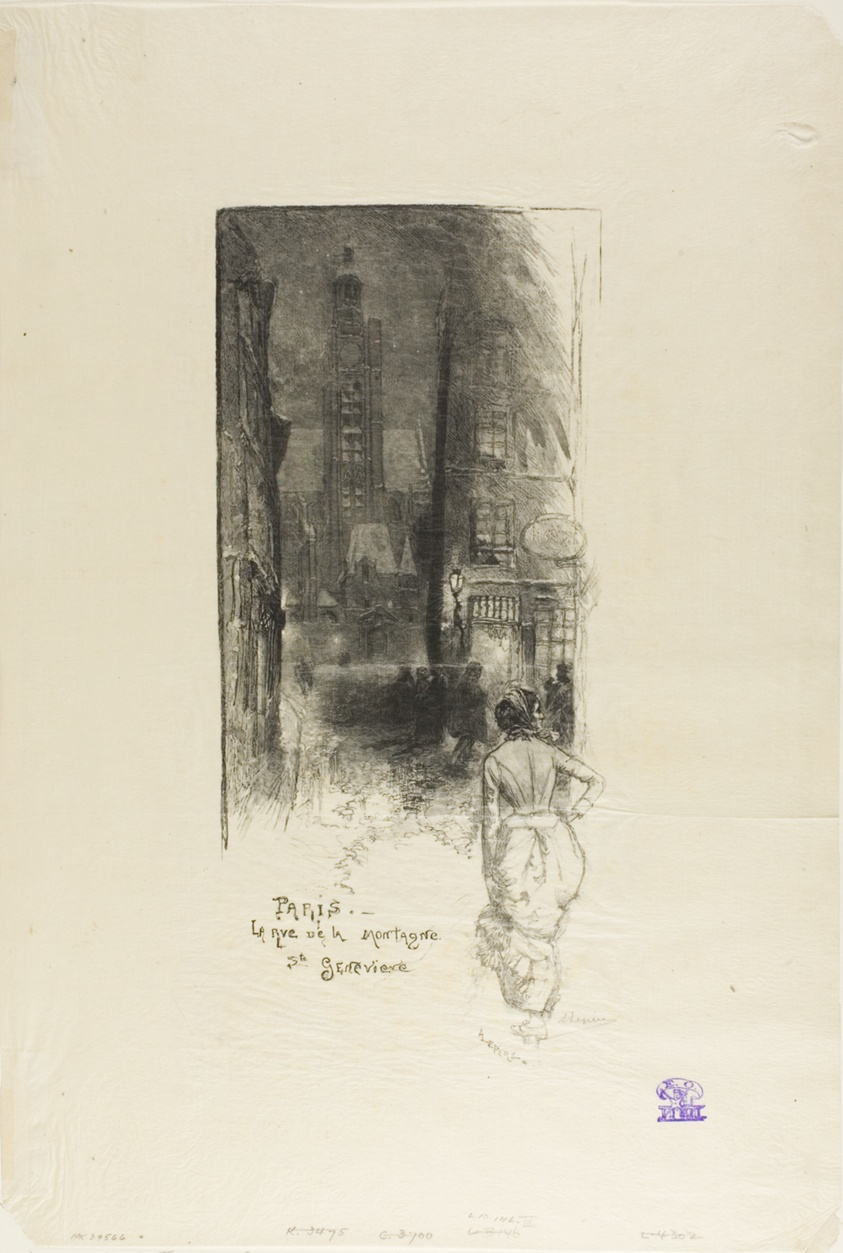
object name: Print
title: Paris: la Rue de la Montagne-Ste-Geneviève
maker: Louis Auguste Lepère (French, 1849-1918)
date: 1886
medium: Wood engraving in black on cream laid Japanese paper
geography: France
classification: wood engraving; print; prints and drawing